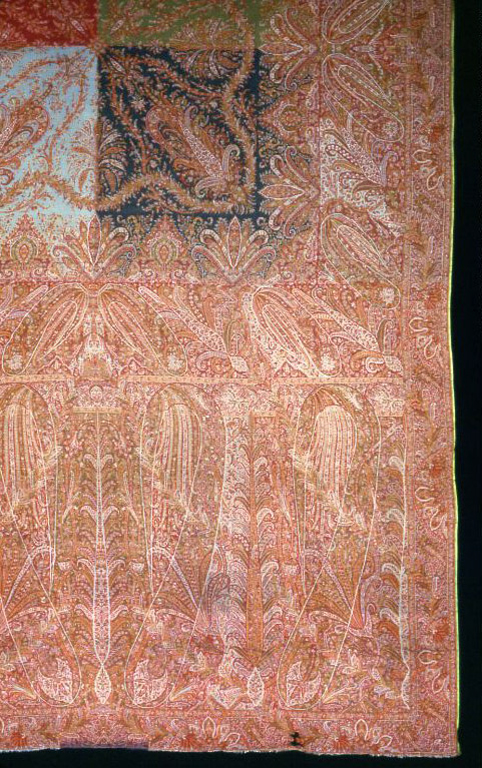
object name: Textile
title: Long Shawl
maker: Probably France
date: c. 1850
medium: Silk and wool, center of weft-float faced 1:3 'Z' twill weave; patterned areas of warp-float faced 3:1 'Z' twill weave with supplementary patterning wefts bound in weft-float faced 1:3 'Z' twill interlacings; woven on loom with Jacquard attachment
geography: France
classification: textile; weaving